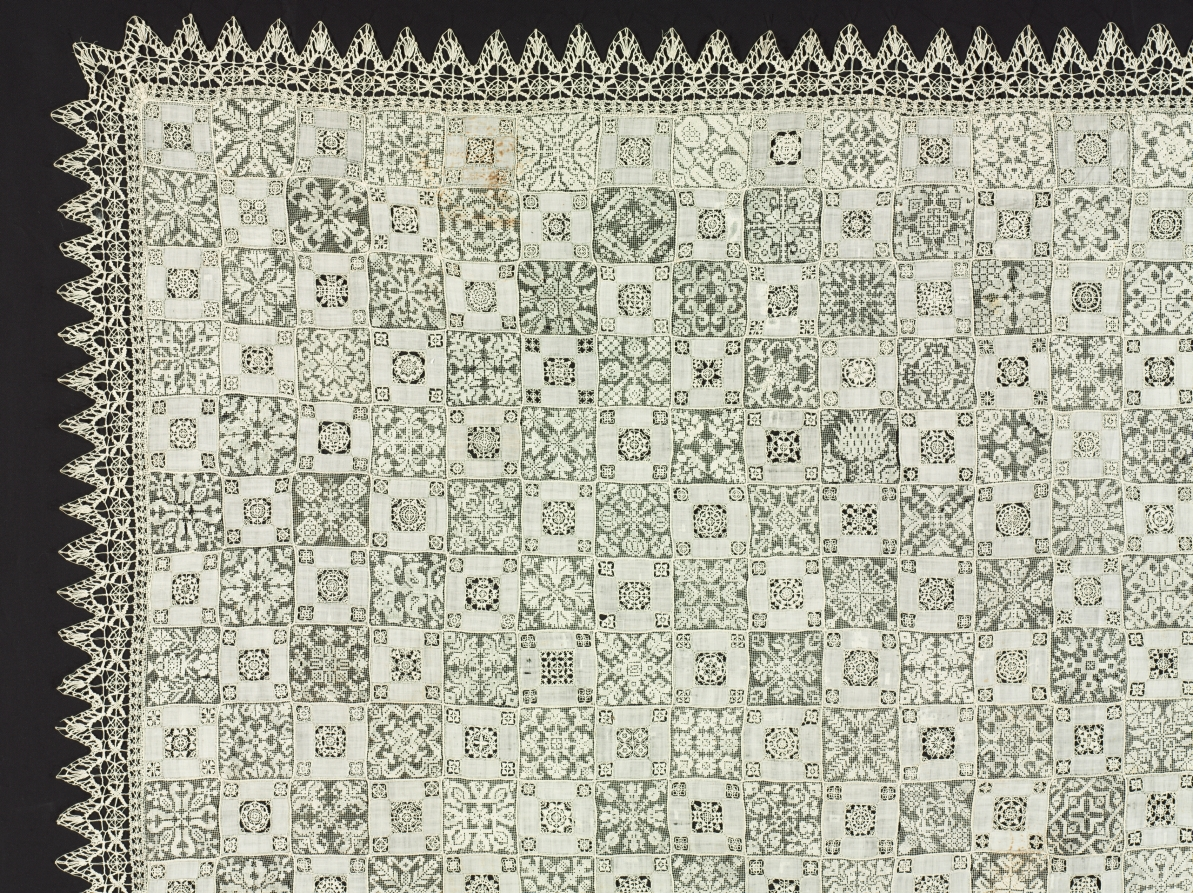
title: Cloth with Floral and Vegetal Patterns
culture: Italy, late 1500s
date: 1560–1600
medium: Bleached linen (est.): needle lace, filet/lacis (knotted ground and darned in two directions), alternating reticella squares (open cutwork), and bobbin lace edging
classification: Lace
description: Textiles often incorporate multiple needlework techniques within a single piece. One of the main techniques in this example of lace is called cutwork. In cutwork, portions of the textile ground, such as a linen or cotton cloth, are cut away and threads are removed to create holes. The edges of the hole are then reinforced with embroidery and a pattern of needle lace can be created within the perimeter. Rather than adding to the cloth to create a design, the craftsperson removes threads to fabricate a pattern.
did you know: The large size and square shape suggest that this textile would likely have been used as a table cloth.